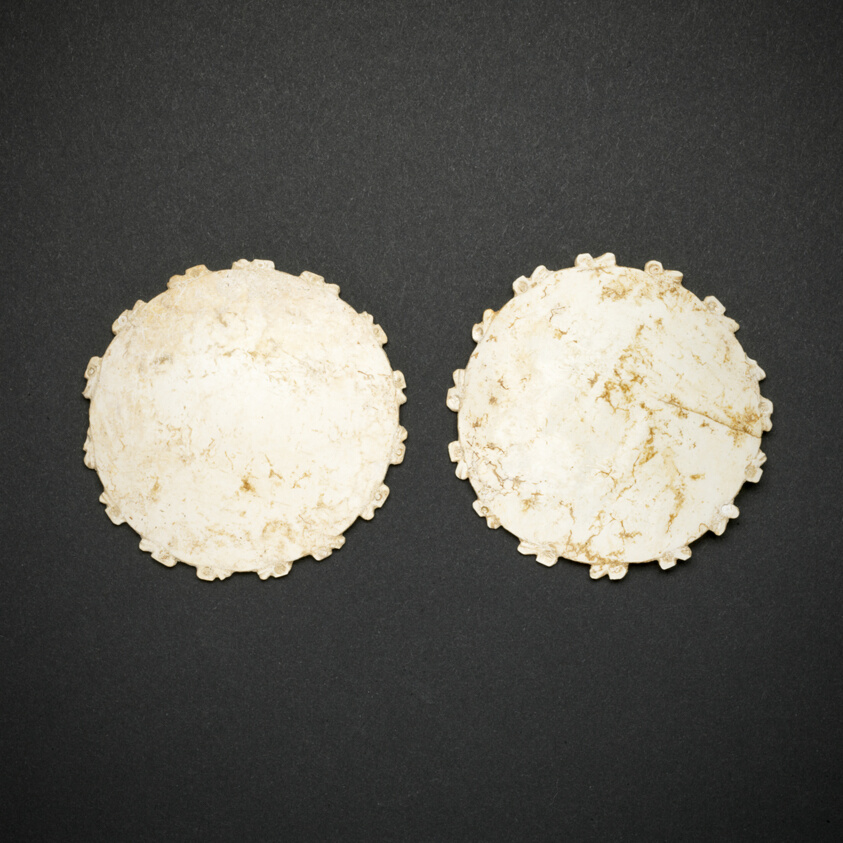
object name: Costume and Accessories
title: Ear Spools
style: colima, mesoamerican, jalisco, americas, west mexico, Arts of the Americas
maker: Colima or Jalisco; Colima or Jalisco, Mexico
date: 200 BCE–200 CE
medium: Spondylus shell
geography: Western Mexico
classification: ear ornament; jewelry; art of the americas; costume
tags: shells, bird, jewelry